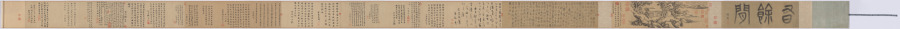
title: Leisure Enough to Spare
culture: China, Yuan dynasty (1271-1368)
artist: Yao Tingmei (Chinese, active mid-1300s)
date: 1360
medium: handscroll, ink on paper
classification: Painting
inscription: 至正廿年春正月_日作此併系鄙語于尾 地偏人遠閉柴關，滿院松陰白晝閒。 眼底風塵渾忘却，坐看流水臥看山。 吳興姚廷美畫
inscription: 23 colophons and 53 seals (dates unavailable for some): 1 colophon, dated 1360, and 2 seals of Yang Weizhen (1296-1370); 1 colophon and 3 seals of Wan Yi; 1 colophon of Zhang Junde; 1 colophon and 3 seals of Angji (act. ca. mid-14th c.); 1 colophon and 1 seal of Xu Shiquan; 1 colophon and 3 seals of Gao Yu; 1 colophon and 2 seals of Li Mingfu; 1 colophon and 2 seals of Lu Lin; 1 colophon and 1 seal of Zhang Qian; 1 colophon of Tao Tangwen; 1 colophon and 1 seal of Wu Yuangui (act. ca. 1300-60); 1 colophon of Bao Jiong; 1 colophon of Wang Zao; 1 colophon and 1 seal of Ma Chuyi; 1 colophon and 1 seal of Lin Yizhuang; 1 colophon and 1 seal of Gu Shunju; 1 colophon and 2 seals of Wang Jing; 1 colophon and 2 seals of Lin Shouchang; 1 colophon and 1 seal of Gao Zhidao; 1 colophon of Lin Xun; 1 colophon, dated 1359, and 2 seals of Meng Weicheng (act. mid-14th c.); 1 colophon and 1 seal of Meng Zhiji (act. mid-l4th c.); 14 seals of Liang Qingbiao 梁清標 (1620-1691); 1 poem dated 1755 and 5 seals of the Qianlong 乾隆 emperor (r. 1736-95); 2 seals of the Jiaqing 嘉慶 emperor (r. 1796-1821); 3 seals of the Xuantong 宣統 emperor (r. 1909-11).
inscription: Title on frontispiece by Zhang Bi 章弼: Signed Gongchen 拱辰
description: Seclusion and leisure—the ideals of the literati, or scholar-gentlemen—are expressed in this mature work by Yao Tingmei. The theme acquired special meaning at a time of the military uprisings near the end of the Yuan dynasty. Dedicated to an ascetic named Du, this work combines painting, calligraphy, and poetry; following the painting are more than 20 poems and essays written by notable scholars, one of whom was the calligrapher Yang Weizhen. It reveals not only the aesthetic taste of the literati but also the practice of contributing artistic and literary works to fulfill social obligations. Yao's painting demonstrates his individual style derived from various ancient masters (Guo Xi, Dong Yuan, and Juran). Yang Weizhen's calligraphy exhibits his bold, vigorous style and his intent to capture the spirit of antiquity in art.